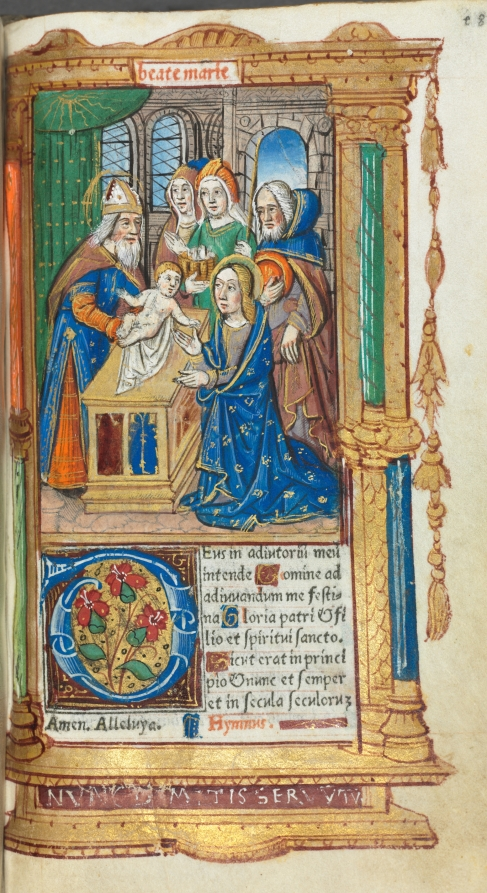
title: Printed Book of Hours (Use of Rome): fol. 40r, Presentation in the Temple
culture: France, Paris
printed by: Guillaume Le Rouge (French, Paris, active 1493–1517)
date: 1510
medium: 112 Printed folios on parchment, bound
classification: Bound Volume